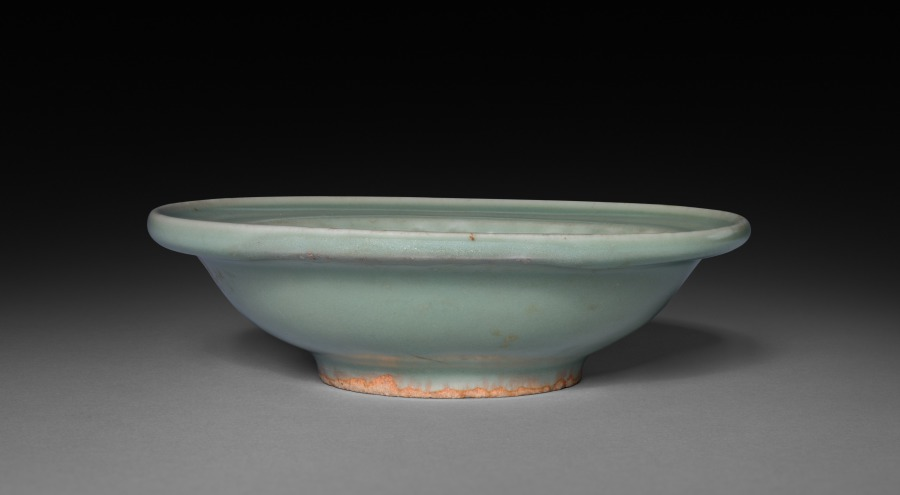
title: Plate: Longquan Ware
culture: China, Southern Song Dynasty (1127-1279) - Yuan Dynasty (1271-1368)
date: 1200s-1300s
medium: glazed porcelain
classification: Ceramic